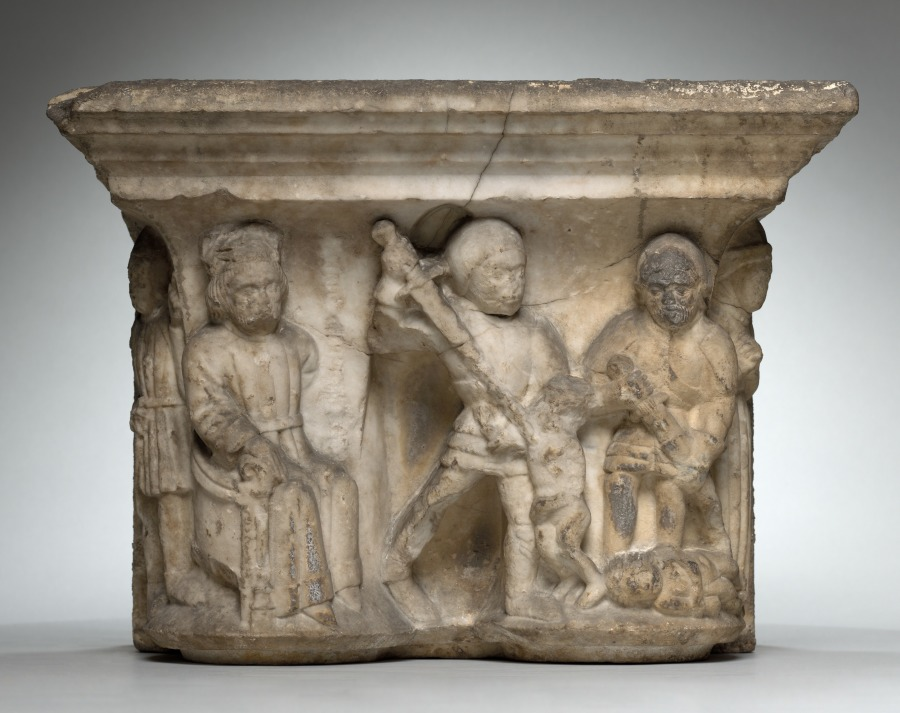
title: Engaged Capitals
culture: Southern France, Abbey of Larreule, near Tarbes, 15th century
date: 1400s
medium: limestone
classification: Sculpture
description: This capital belongs to a surviving group including other architectural fragments that once decorated the cloister of the Abbey of Larreule. A cloister was a covered walkway or arcade, usually around all four sides of a square area of grass (the "cloister garth"). The seclusion of the cloister was the monks’ exclusive domain, off limits to others. Here, the monks were supposed to pray, study, meditate, and exercise in privacy and solitude. Such cloister capitals served both to instruct the monks and as a focus for their devotions. Other capitals in this series are installed in the Jardin Massey at Tarbes, near the original abbey. An arch from Larreule has been assembled with other associated French capitals at The Cloisters in New York.